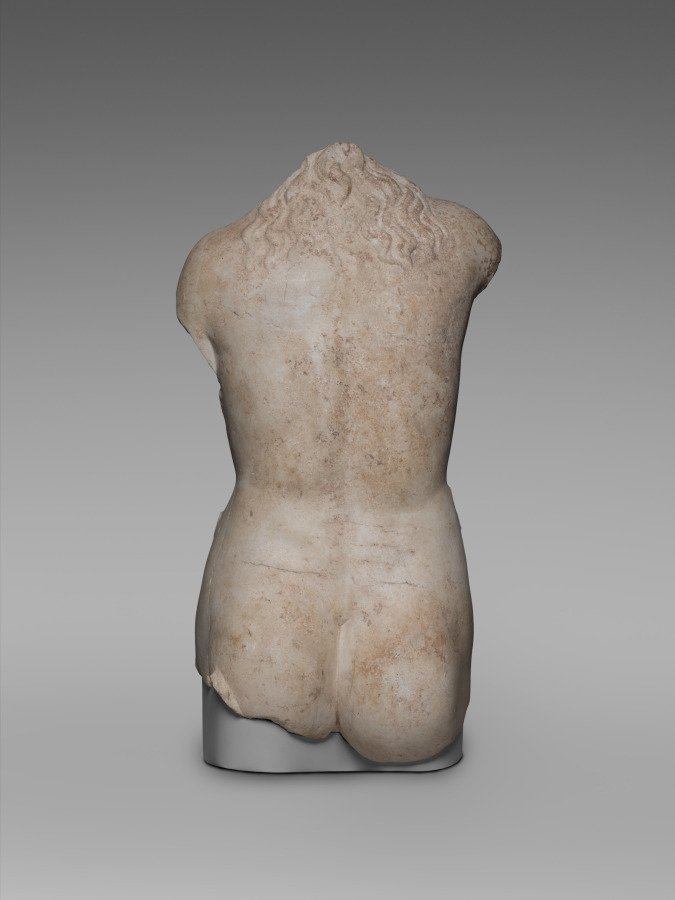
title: Aphrodite Torso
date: 200–1 BCE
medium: Thasian marble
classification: Sculpture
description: This torso can be identified through its nudity and pose as the Greek goddess of love, Aphrodite. Based on the now-lost Aphrodite of Knidos, a revolutionary marble sculpture created by Praxiteles of Athens in the mid-300s BCE, this sculpture belongs to a popular Greek and Roman type showing the goddess at her bath. With hips slightly shifted, she stood in a relaxed posture with most of her weight on one leg, probably with one hand modestly covering her pubic region and the other shielding her breasts or holding drapery. Alternatively, one or both hands may have tended to her wet hair, some of which falls over her neck and upper back.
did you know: This torso is based on the Aphrodite of Knidos, a Greek original by the master sculptor Praxiteles.